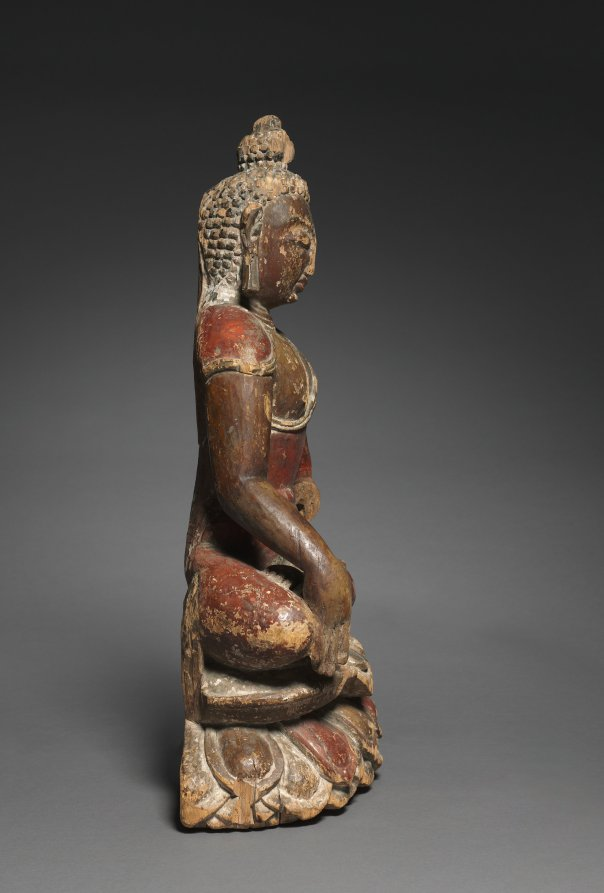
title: Seated Buddha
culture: Western Himalayas, possibly Ladakh or Lahul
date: 1000s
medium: painted wood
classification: Sculpture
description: Eleventh-century western Tibet experienced a period of fervent reconstruction of Buddhist monasteries following the persecution of Buddhism during the 9th and 10th centuries. Art from Kashmir was avidly collected and copied as part of those reconstruction efforts. Kashmiri stylistic traits, such as the pinched waist and abdominal musculature seen in this rare wooden image, are from that critical time. The pioneering Italian Tibetologists Giusseppe Tucci and Egenio Ghersi discovered this sculpture during an expedition to Tibet from 1933 to 1935